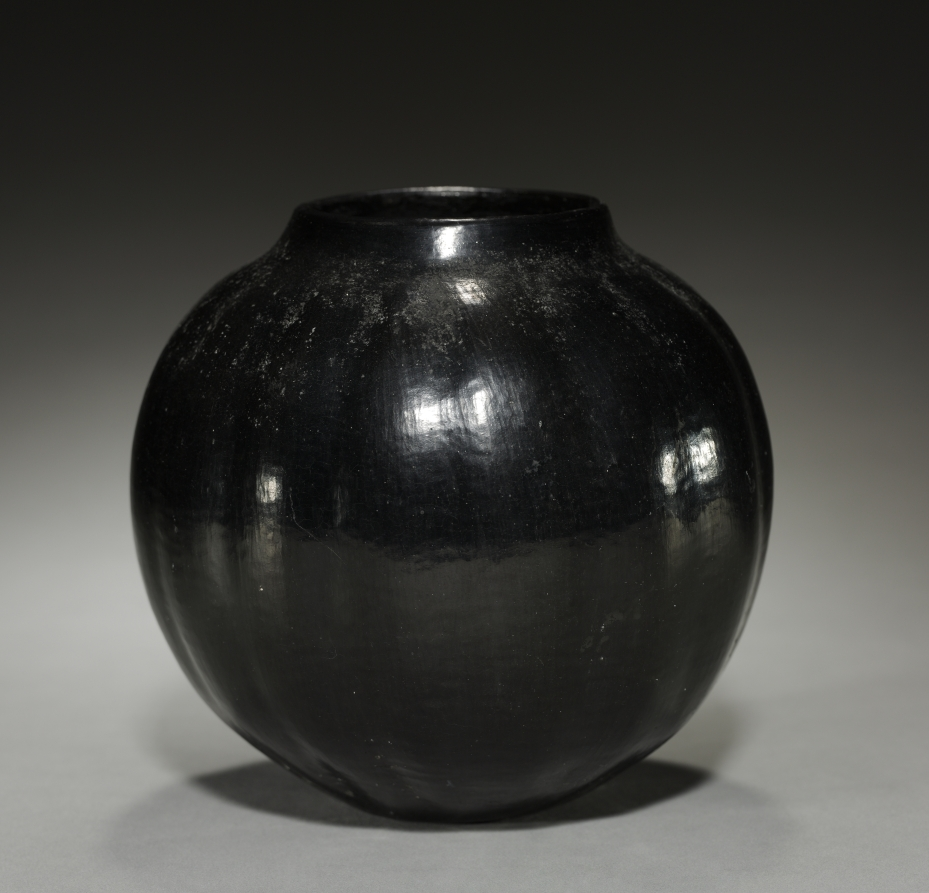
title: Pumpkin-shaped Jar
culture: Southwest, Santa Clara Pueblo, 20th century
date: c. 1900– 1925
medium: black ware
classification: Ceramic